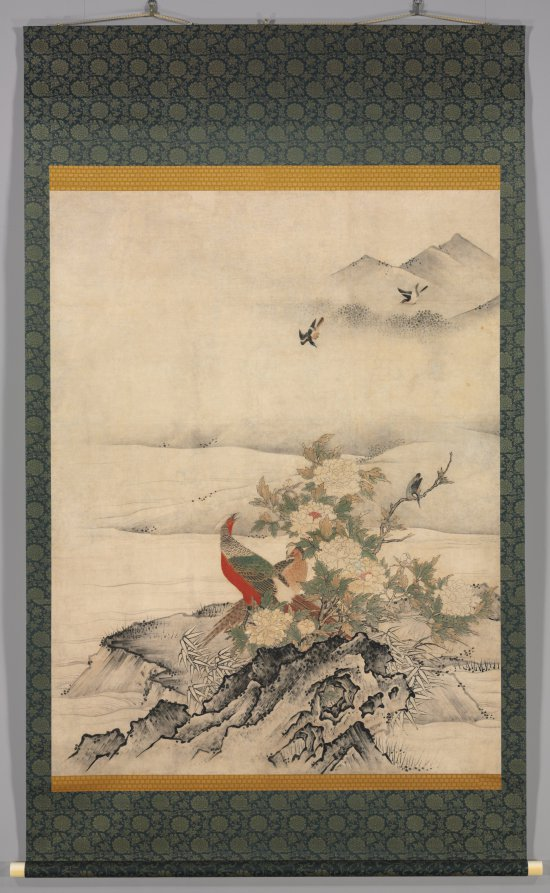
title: Flowers and Birds in a Spring Landscape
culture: Japan, Muromachi period (1392–1573)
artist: attributed to Kano Motonobu (Japanese, c. 1476–1559)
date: 1500s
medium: One of a set of sliding door panels mounted as hanging scrolls; ink and color on paper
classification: Painting